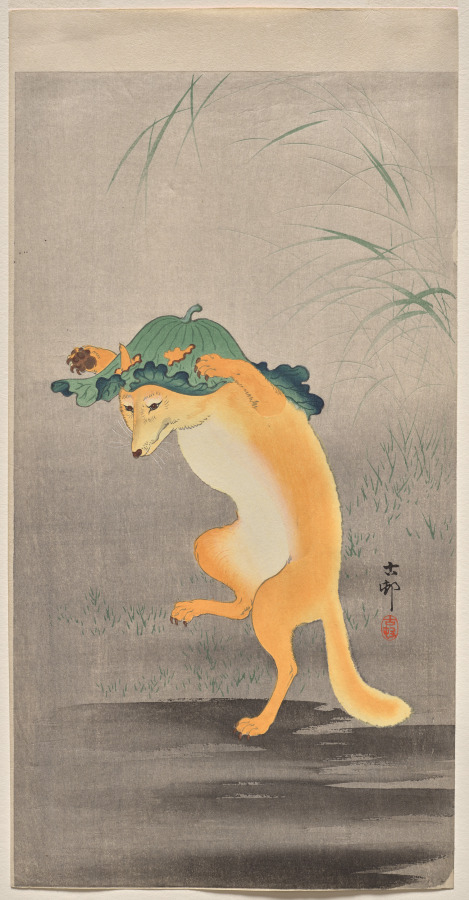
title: Dancing Fox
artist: Ohara Koson (Japanese, 1877–1945)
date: 1900–1910s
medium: Color woodcut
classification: Print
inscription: Signed and sealed by the artist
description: In this whimsical Japanese color woodcut, a fox holds a giant green leaf on its head and dances on its hind legs in the rain. A prolific printmaker, Ohara Koson created hundreds of kachōga, a genre encompassing images of nature. Translating characteristics of traditional Japanese painting into color woodcuts, Koson depicted flowers, insects, fish, birds, and mammals. Dancing Fox is one of a few in which he imagined a lighthearted scenario.